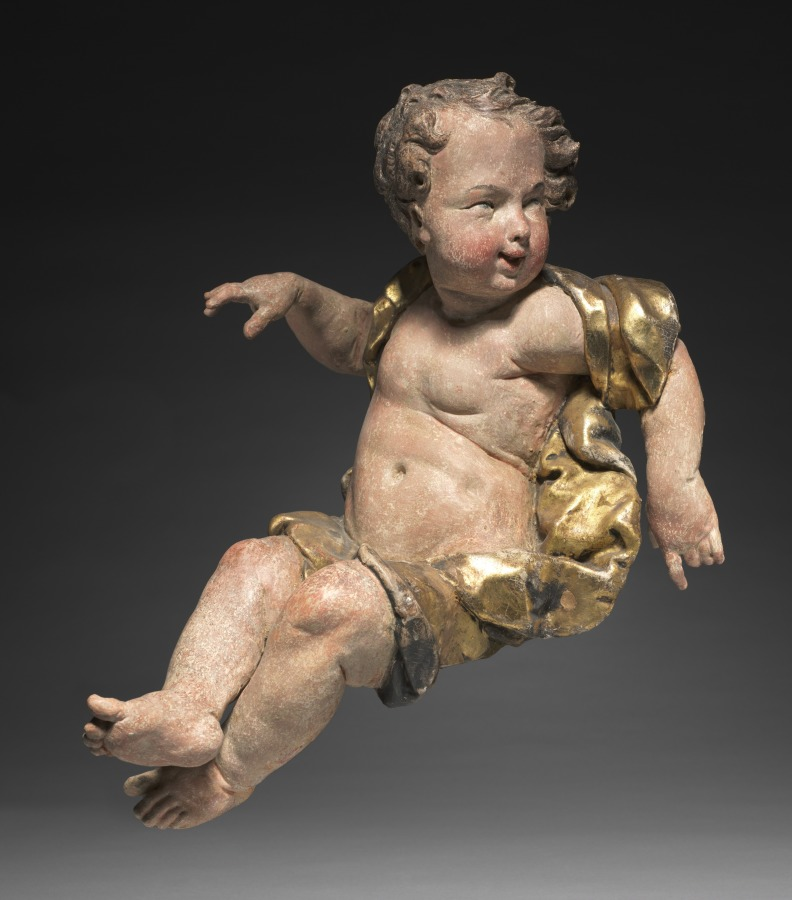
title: Putti Pair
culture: Germany, near Bamberg, 18th century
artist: Ferdinand Tietz (Austrian, 1708–1777)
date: mid-1700s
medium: painted and gilded wood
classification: Sculpture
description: These airborne cherubs probably formed part of the decorations crowning an church altar. One of the putti holds a heart, which would originally have included a flame (now lost). An expression of religious fervor, the burning heart also referenced the Sacred Heart of Jesus, which in Christian imagery symbolized Christ’s love for humanity.